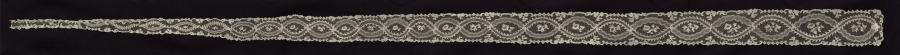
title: Lace Lappet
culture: France, Argentan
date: 1715–74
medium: Linen: needle lace (Point de Argentan)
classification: Lace